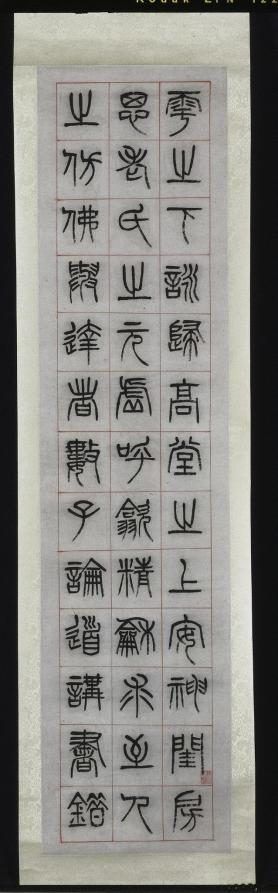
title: On Happiness, Calligraphy in Seal Script Style (zhuanshu)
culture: China, Changsu, Qing dynasty (1644-1911)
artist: Yang Yisun (Chinese, 1813–1881)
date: 1871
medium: hanging scroll, ink on paper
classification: Painting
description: Yang Yisun transcribed this ancient text on six narrow scrolls, starting at the top right and ending at the bottom left. Yang emphasizes the text’s historic nature by using the seal script style found on stone steles and bronze vessels. On Happiness features reflections of a scholar on a leisurely life in the countryside, composed by Han dynasty official Zhongchang Tong, who died the year the Han dynasty collapsed (AD 220). The idyllic life described in the text may bean evocation of the past in a time of national crisis. A decade before Yang wrote these scrolls, Anglo-French forces had looted and burned the Summer Palace in Beijing. At the same time, the domestic Taiping rebellion (1850–64), led by a religious fanatic to overthrow the Qing government, had devastated Yang’s homeland, the Jiangnan region, with an estimated 20 million lives lost.